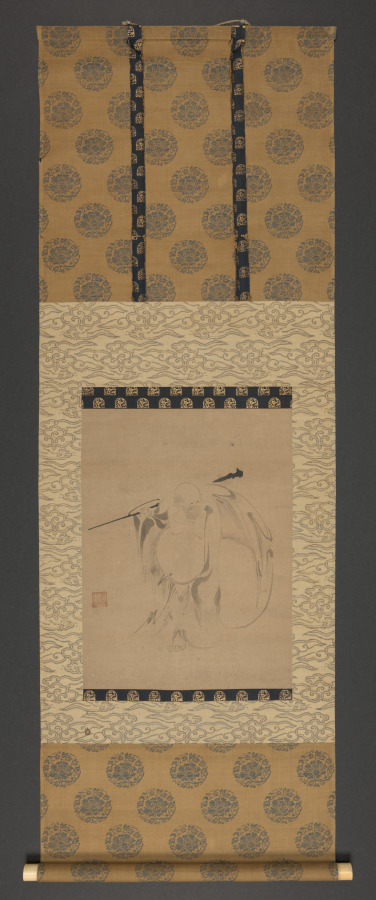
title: Hotei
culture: Japan, Muromachi period (1392–1573)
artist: Tokuchū (Japanese, late 1400s)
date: late 1400s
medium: hanging scroll; ink on paper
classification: Painting